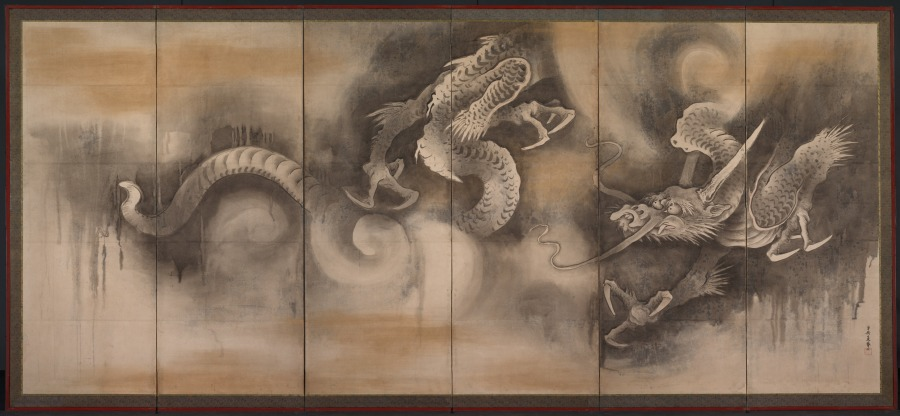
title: Dragon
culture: Japan, Edo period (1615–1868)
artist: attributed to Soga Nichokuan (Japanese)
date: early to mid-1600s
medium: six-panel folding screen; ink, slight color, gold, and silver on paper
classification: Painting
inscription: Signed: Soga Chokuan II (Soga Chokuan ni). Sealed: Hoin (right), Soga Chokuan Hoin (three seals at left) Edo period (1615-1868)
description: A dragon dives through clouds on this screen, while on the other screen, a tiger looks upon a waterfall as it prowls out of a bamboo grove. Tiger and dragon are traditional symbols of the balancing forces in the world, yin (the feminine aspect) and yang (the masculine aspect). This painting has a signature and seals, identifying it as a work by Soga Nichokuan, a painter thought to be from Sakai (near Osaka), and known primarily for his representations of hawk-eagles (kumataka).